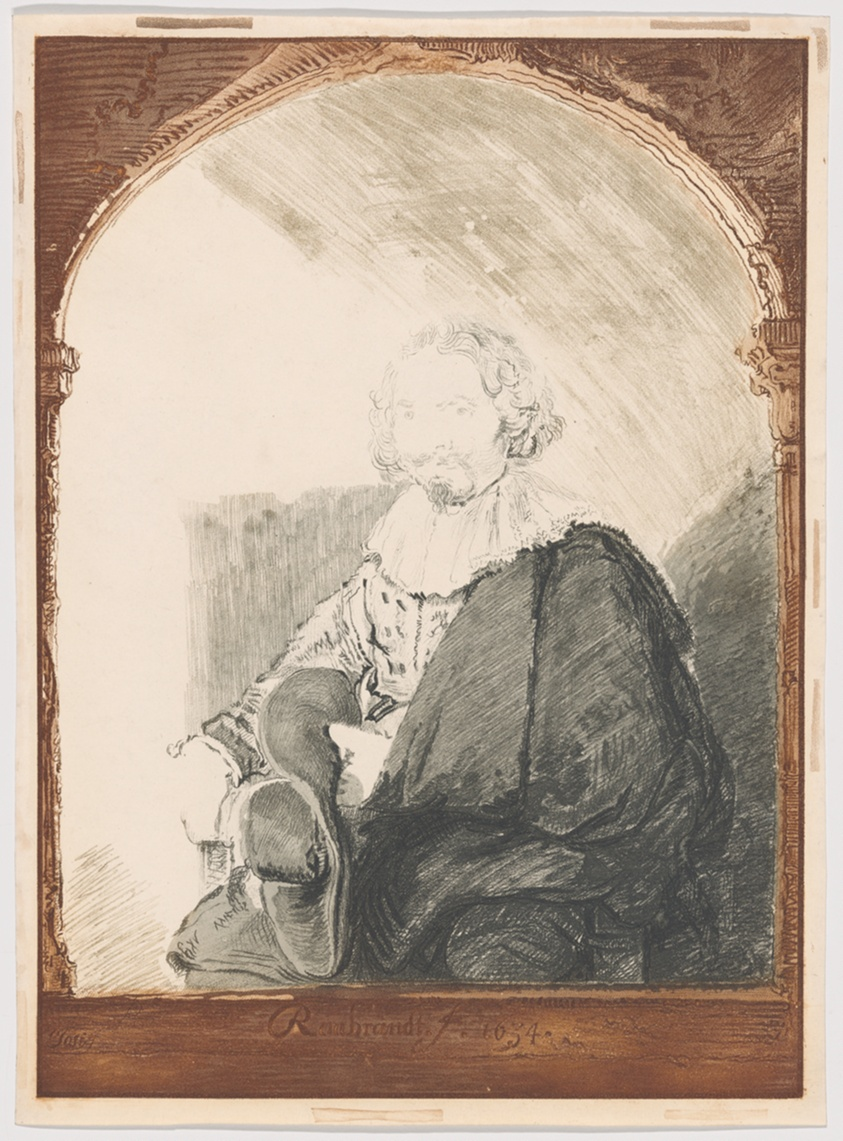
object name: Print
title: Portrait of a Man in an Armchair, from Collection d'imitations de Dessins d'après les Principaux Maîtres Hollandais et Flamands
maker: Christian Josi (Dutch, died 1828); after Rembrandt van Rijn (Dutch, 1606-1669)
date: 1826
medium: Soft ground etching, aquatint, and roulette inked à la poupée in black and brown on white wove paper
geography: Holland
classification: etching; print; prints and drawing